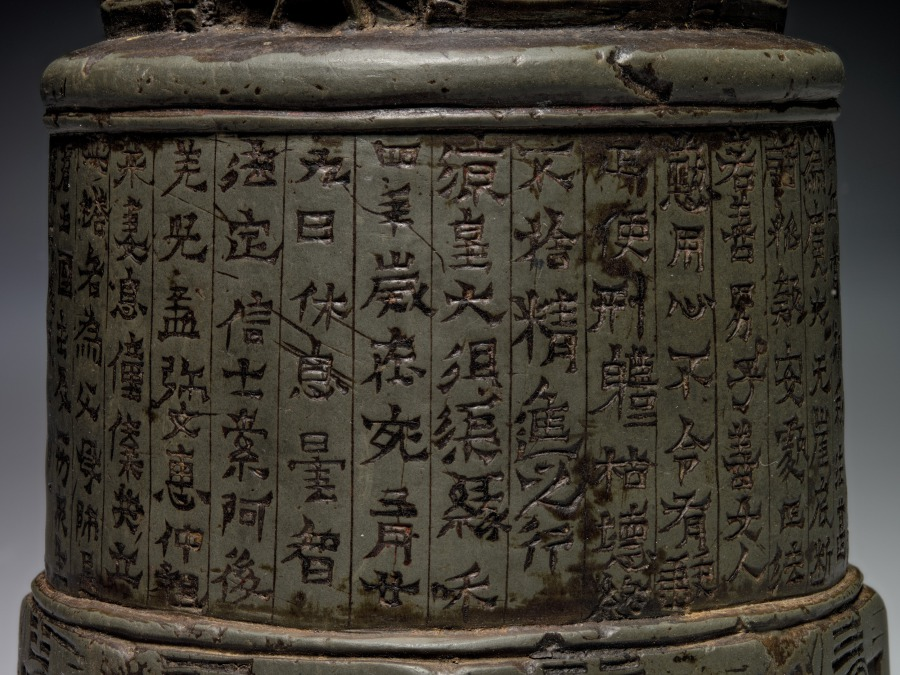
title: Miniature Votive Stupa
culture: China, Gansu province, Northern Wei dynasty (386-534)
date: 435 CE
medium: steatite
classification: Sculpture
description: This sutra pillar, inscribed with a sacred Buddhist text, belongs to a group of miniature stupas (jingta) that were found exclusively in the Gansu corridor, Northwest China. Ranging in date between AD 426–36, some of them bear the names of the lay Buddhist donors who commissioned them. A stupa is an architectural round structure built for the veneration of Buddhist relics. Miniature stupas may have commemorated the visit of a sacred site or represented donations to religious communities and sites.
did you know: There are trigrams, three horizontal lines, broken or continuous, above each of the eight bodhisattvas in the stupa's lower section.